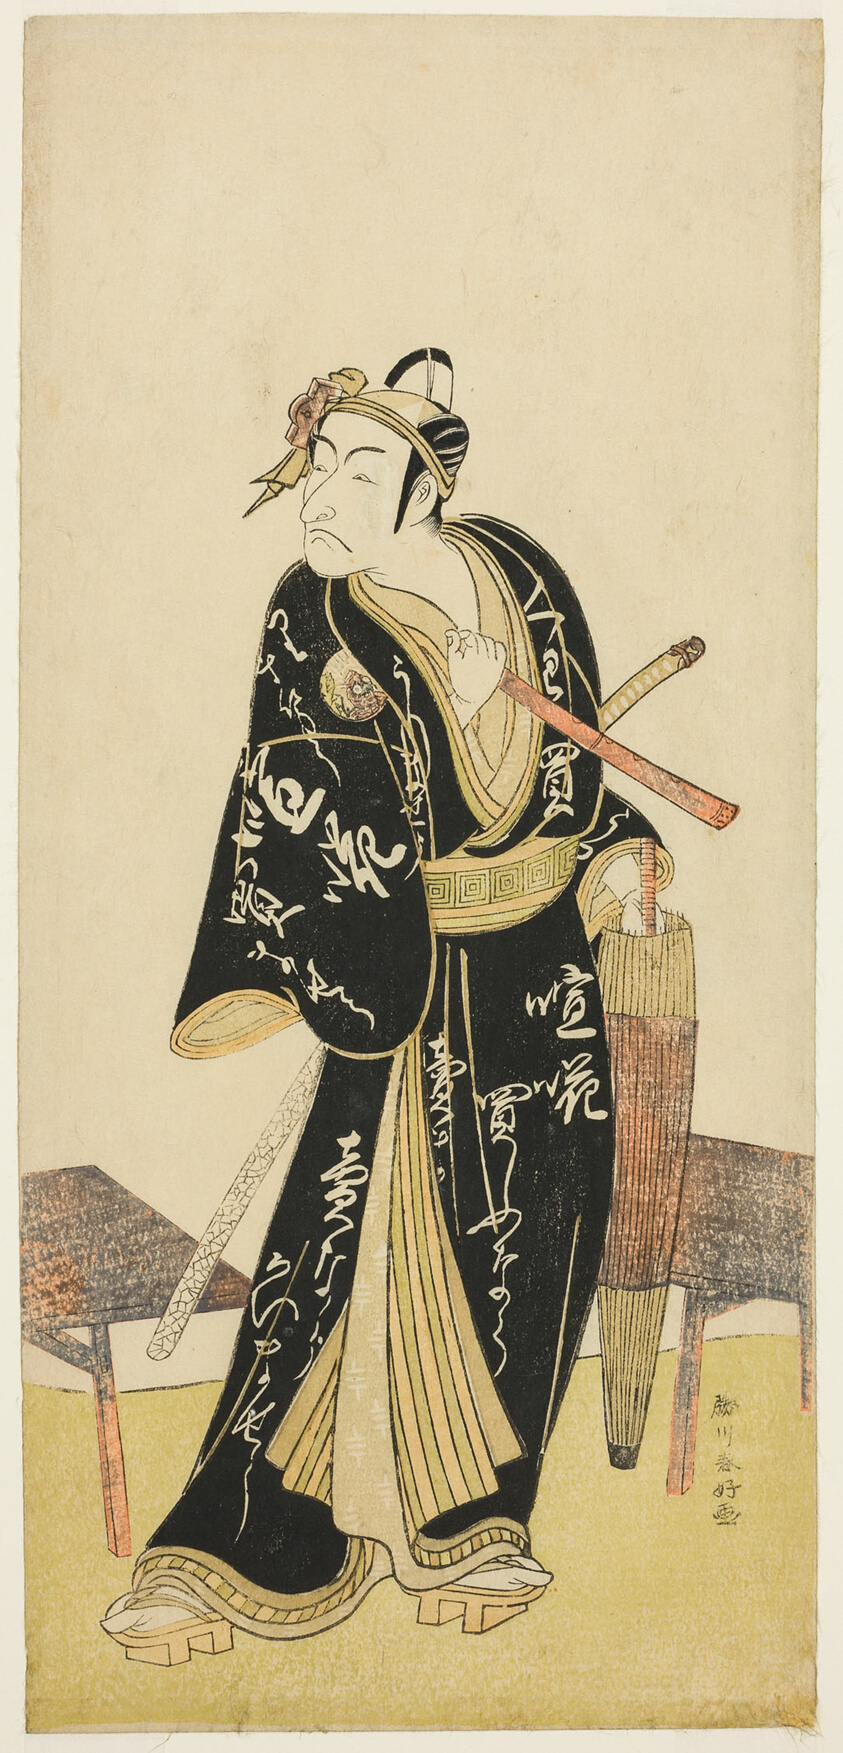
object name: Print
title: Actor Ichikawa Danjûrô V as Sukeroku in “The Seven Guises of Soga” (“Nanakusa Yosooi Soga”)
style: Japanese (culture or style)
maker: Katsukawa Shunkô; Japanese, 1743–1812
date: 1782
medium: Color woodblock print; hosoban (center sheet of a triptych)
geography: Japan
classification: woodblock print; print; asian art